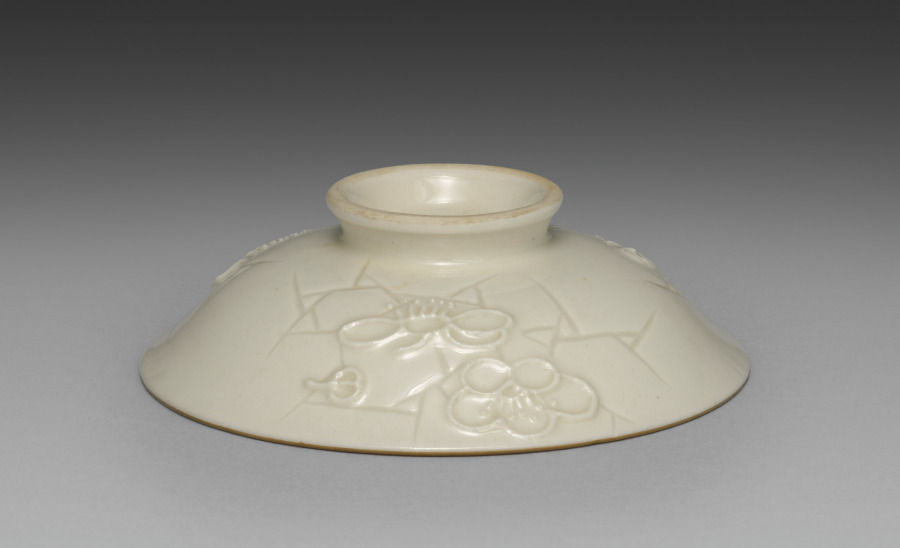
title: Cover for a Bowl from Dining Set with Plum Blossoms and Cracked-Ice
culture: Japan, Meiji period (1868–1912)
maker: Seifū Yohei II (Japanese, 1844–1878)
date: c. 1875–78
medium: Porcelain with molded designs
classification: Ceramic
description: Each item in this set has a delicate low-relief design of flowering plum branches over scattered, intersecting lines meant to resemble the cracked-ice surface of a frozen body of water and is signed on the base in gold pigment. While Yohei II produced many fine works in underglaze blue, like those produced by Kiyomizu Shichibei, he also made works in quite different styles later in his career, from the early 1870 s. In 1873, he was appointed purveyor to the Industrial Center of Kyoto Prefecture, a designation associated with Kyoto’s efforts to reach an international market through the port of Kobe; and from 1875 until his death, he was involved in national-level projects to present Japanese ceramics across the world. It was during this period that Yohei III was apprenticed to Yohei II, and it has been suggested that this set may in fact be an early example of Yohei III’s work, which he signed with his teacher’s name. Decorated with flowers resembling Japanese textile motifs, the set calls to mind the design of Yohei II’s pair of vases with plum blossoms in the Victoria and Albert Museum. Here, the elaborate trees created for a formal public exhibition setting have been translated into the approachable blossoms of the genteel domestic environment. While the designs are consistent across the pieces, each raised flower petal and pistil and each incised line in the ice was done by hand, so the cups, bowls, and dishes are similar yet unique. The bottoms of two boxes once identified the set’s owner, but the information has been deliberately obscured with black ink. However, inscriptions still visible appear to indicate two occasions, once at the end of July 1886 , and once again in June 1916 , when parts of the set were requested from Hokura in Niigata Prefecture. The location corresponds to a neighborhood in the present-day city of Jōetsu. The surname Tsuji 辻 also appears on a paper tag affixed to one of the box cloths. Future research may possibly reveal more about their provenance. A vase by Yohei III in a private collection combines the formal grandeur of the Yohei II vases in the Victoria and Albert Museum with the gentler design of this dining set, placing flowering plum trees against soft, scalloped-edge clouds resembling those in golden screens.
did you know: The dining wares have a creamy white coloration that the four boxes containing them identify as Korean in style.